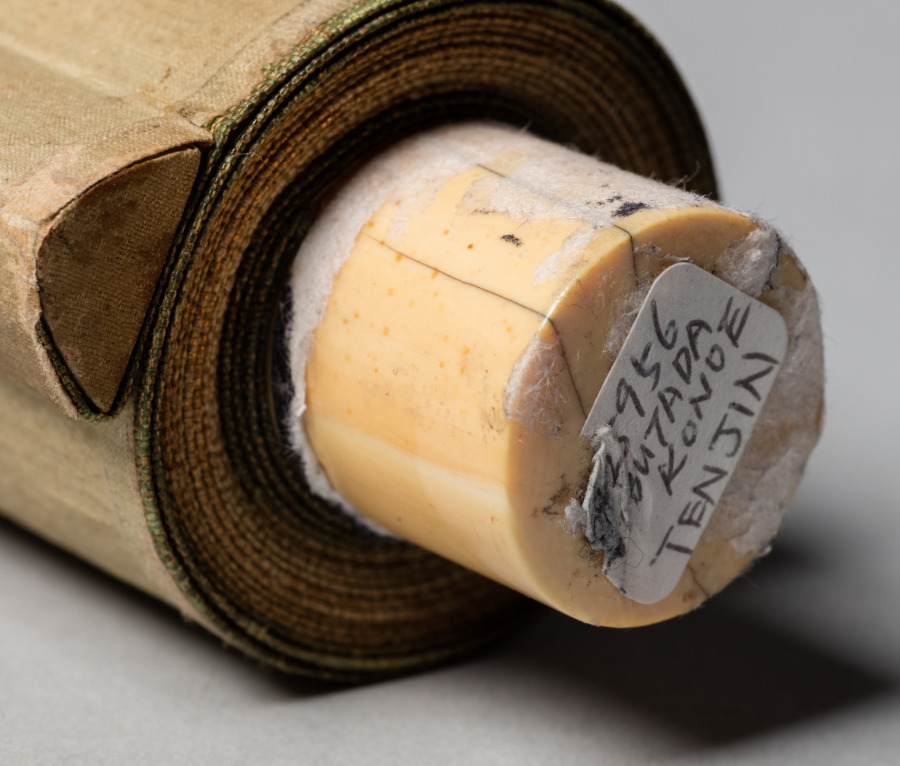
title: Tenjin Traveling to China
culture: Japan, Momoyama period (1573–1615)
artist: Konoe Nobutada (Japanese, 1565–1614)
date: 1610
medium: hanging scroll; ink on paper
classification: Painting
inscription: signed: Nobutada's cipher signature kao inscribed: two poems above, dated Keicho 15